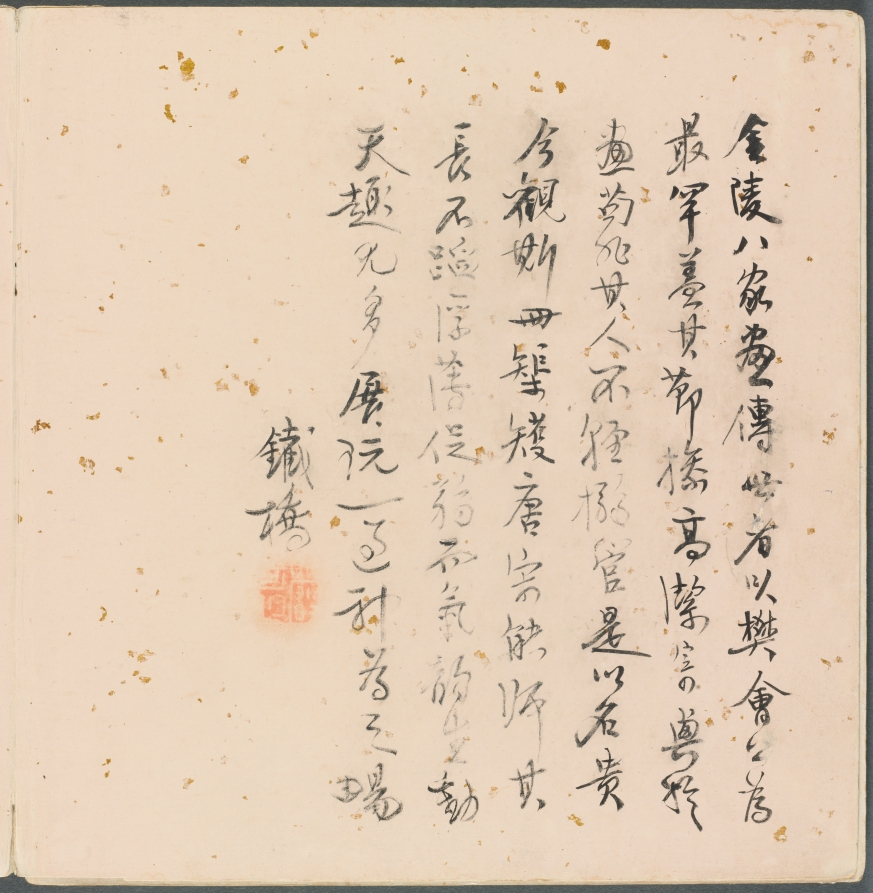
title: Album of Miscellaneous Subjects, Colophon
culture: China, Qing dynasty (1644-1911)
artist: Fan Qi (Chinese, 1616–after 1694)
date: early 1650s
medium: album leaf, ink and color on silk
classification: Painting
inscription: 1 colophon and 1 seal of Tomioka Tessai 富岡鐵齋 (1836-1924)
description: The Japanese artist Tomioka Tessai (1836-1924) adds a colophon on the last page, commenting on the rarity of Fan Qi's paintings among those of the Eight Masters of Nanjing. They were modeled after Tang and Song masters and captured the rhythms of life. "Whenever I open this album, my mind is pleased," he writes.